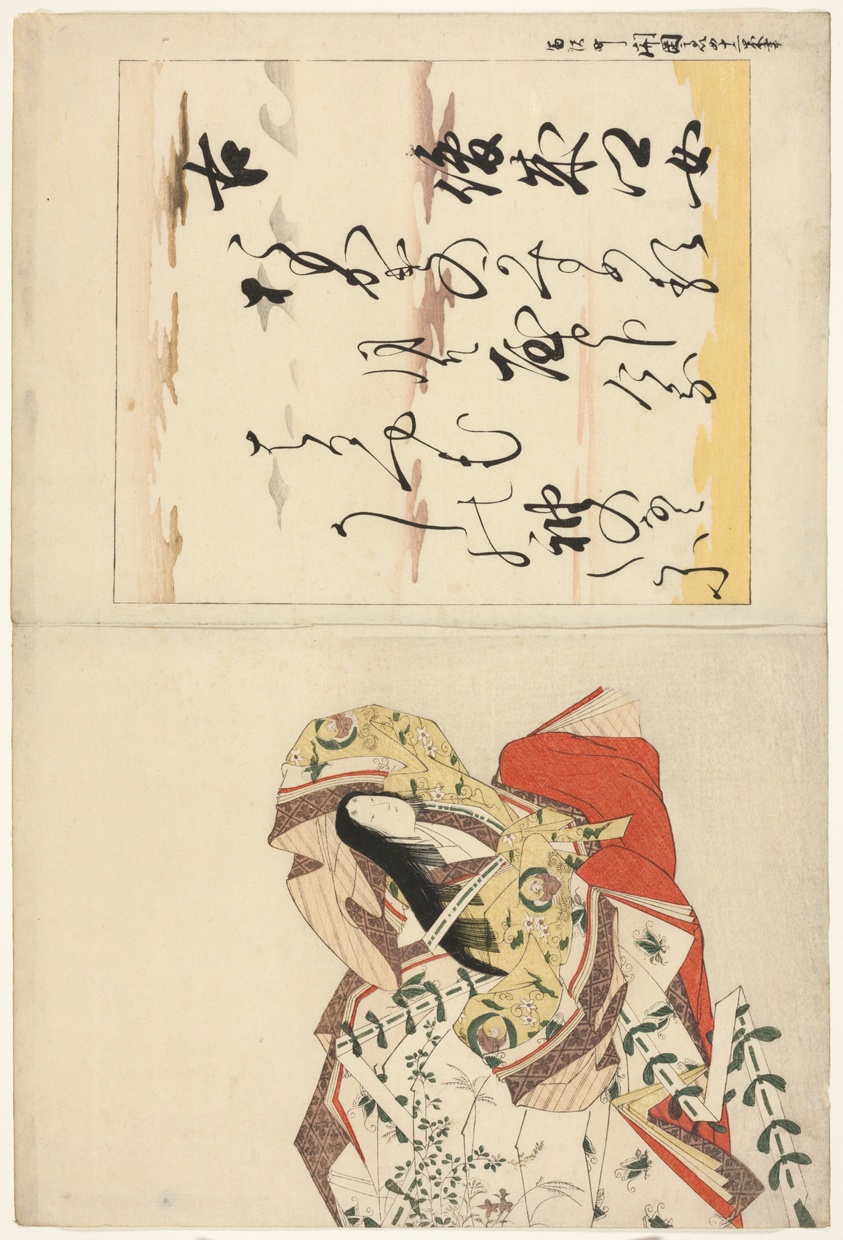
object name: Print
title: The Poetess Shunzei no Musume, from the series The Thirty-six Immortal Women Poets (Nishikizuri onna sanjurokkasen)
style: Japanese (culture or style)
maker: Chobunsai Eishi; Japanese, 1756-1829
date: Edo period (1615–1868), 1801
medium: Page from a color woodblock-printed volume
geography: Japan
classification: woodblock print; print; asian art